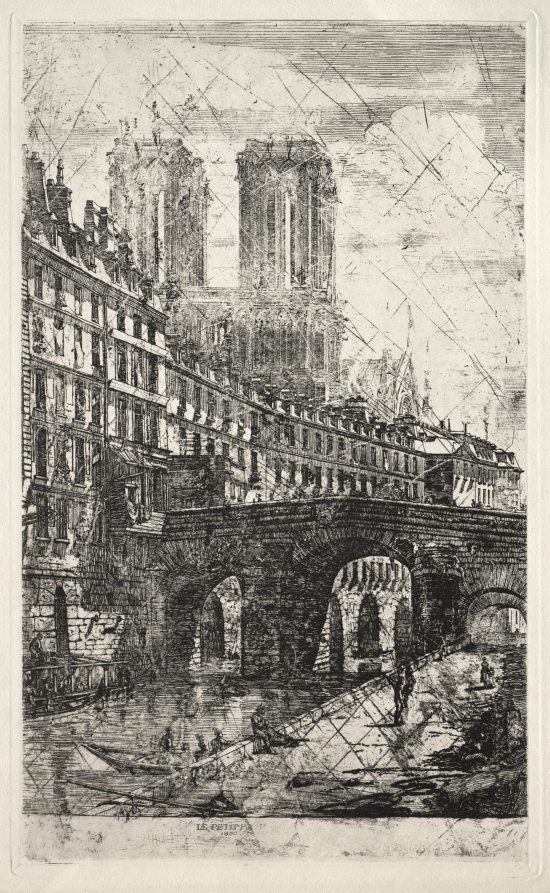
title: Etchings of Paris: The Little Bridge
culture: France, 19th century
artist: Charles Meryon (French, 1821–1868)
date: 1850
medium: etching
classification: Print